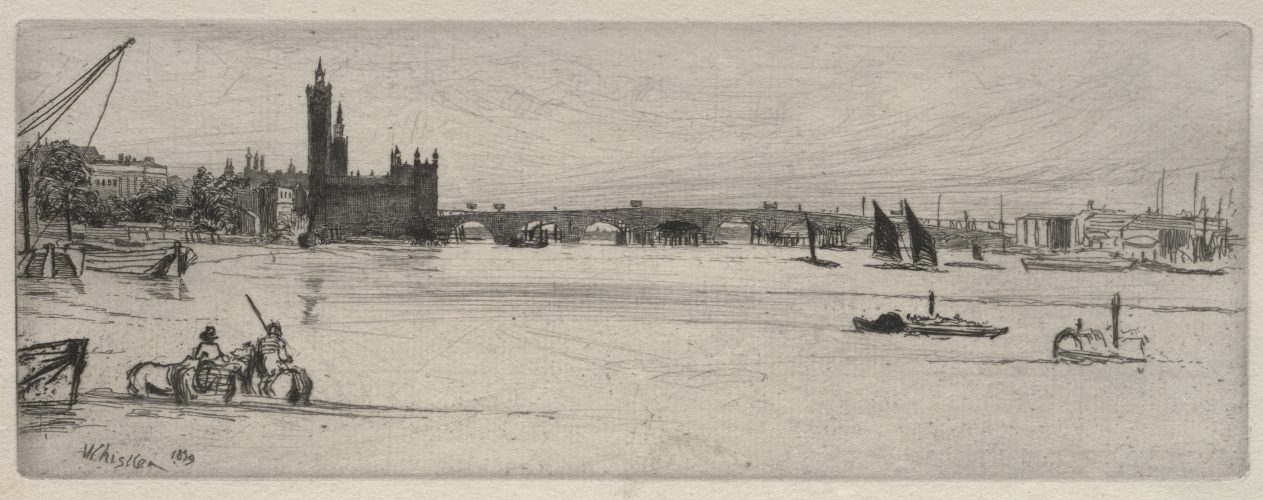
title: Old Westminster Bridge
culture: America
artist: James McNeill Whistler (American, 1834–1903)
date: 1859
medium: etching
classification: Print